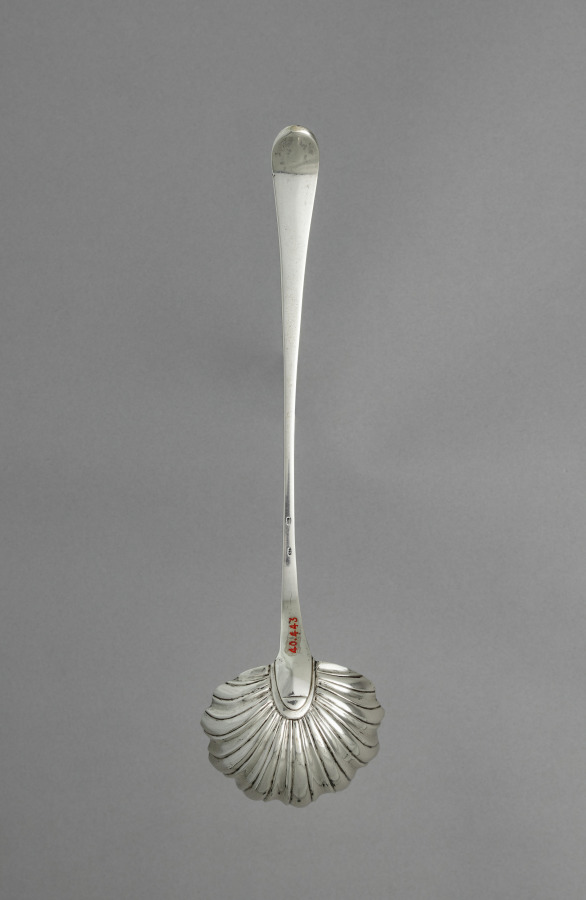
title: Soup Ladle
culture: America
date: c. 1780–1790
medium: silver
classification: Silver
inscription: engraved "R" over "C*B" in block letters on top of handle end.